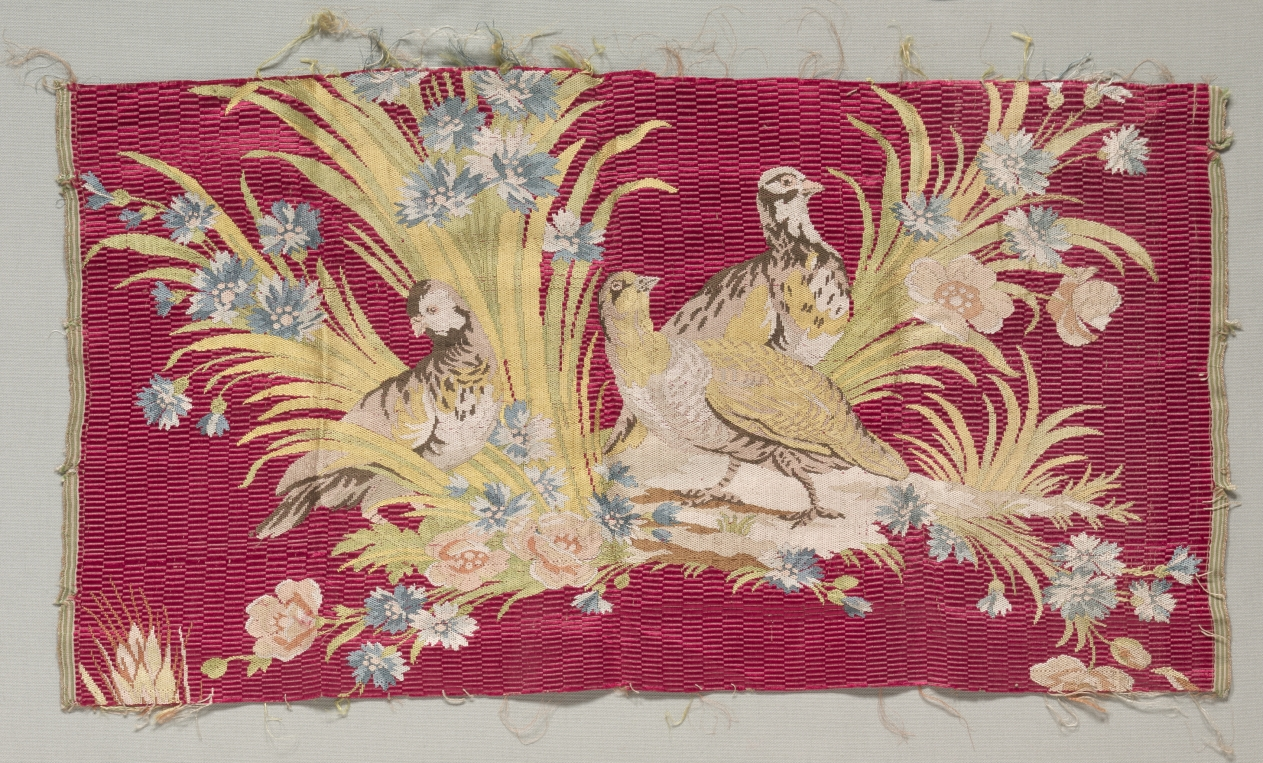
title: Silk Fragment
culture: France, 18th century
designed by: Philippe de Lasalle (French, 1723–1805)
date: before 1779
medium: lampas weave with cannetillé ground, brocaded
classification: Textile